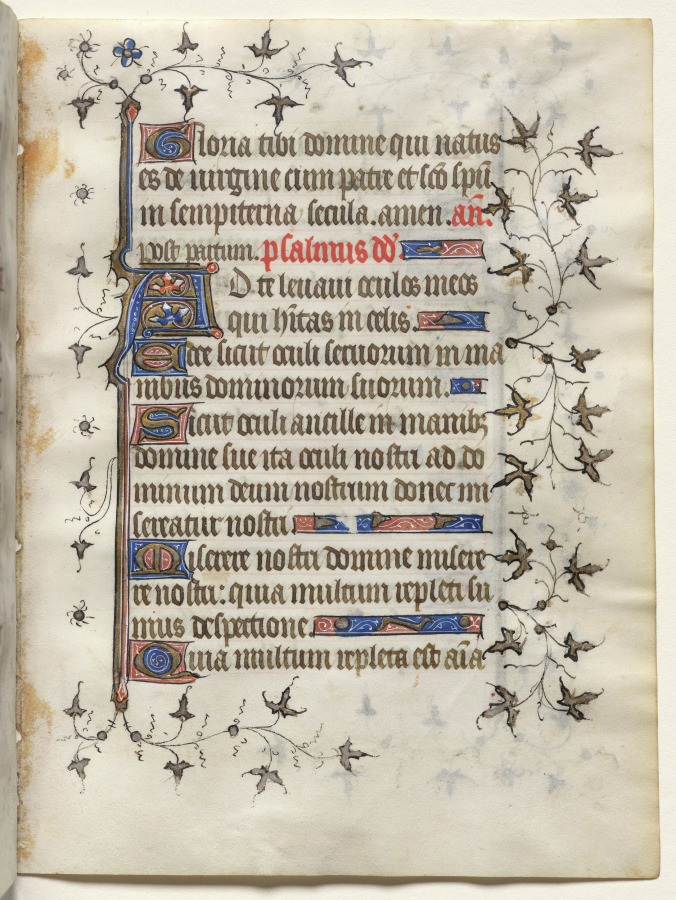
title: Bifolio from a Book of Hours: Text (verso)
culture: France, Paris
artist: workshop of Boucicaut Master (French, Paris, active about 1410–25)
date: c. 1415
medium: ink, tempera, and gold on vellum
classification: Manuscript